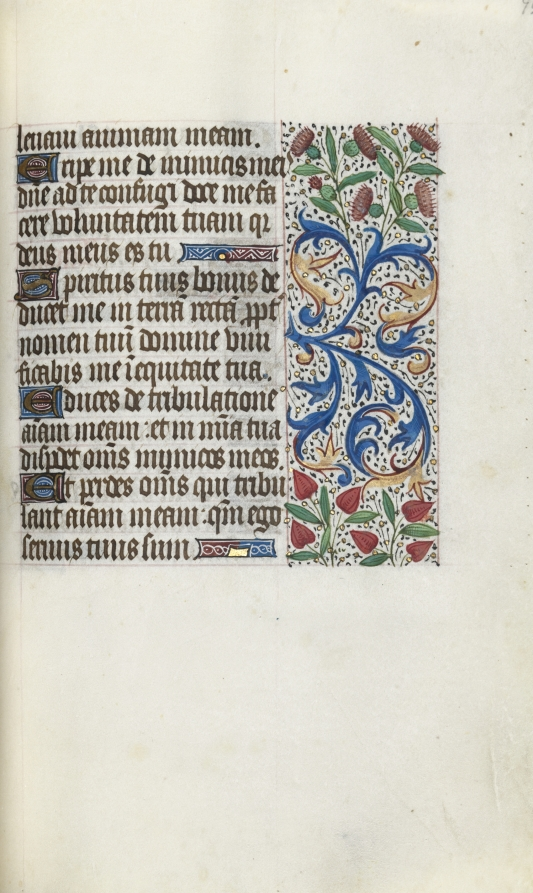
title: Book of Hours (Use of Rouen): fol. 92r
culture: France, Rouen, 15th century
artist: Master of the Geneva Latini (French, active Rouen, 1460–80)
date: c. 1470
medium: ink, tempera, and gold on vellum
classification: Bound Volume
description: In the late 1400s and early 1500s Rouen was an established and important center of book production. The city’s cathedral had a wealthy chapter that spent large sums of money to commission books and to maintain its extensive library. The stationers and booksellers would have likely been concentrated in or near the cathedral precinct. This artist, named after a manuscript now in Geneva, was Rouen’s principal illuminator during the second half of the 1400s.